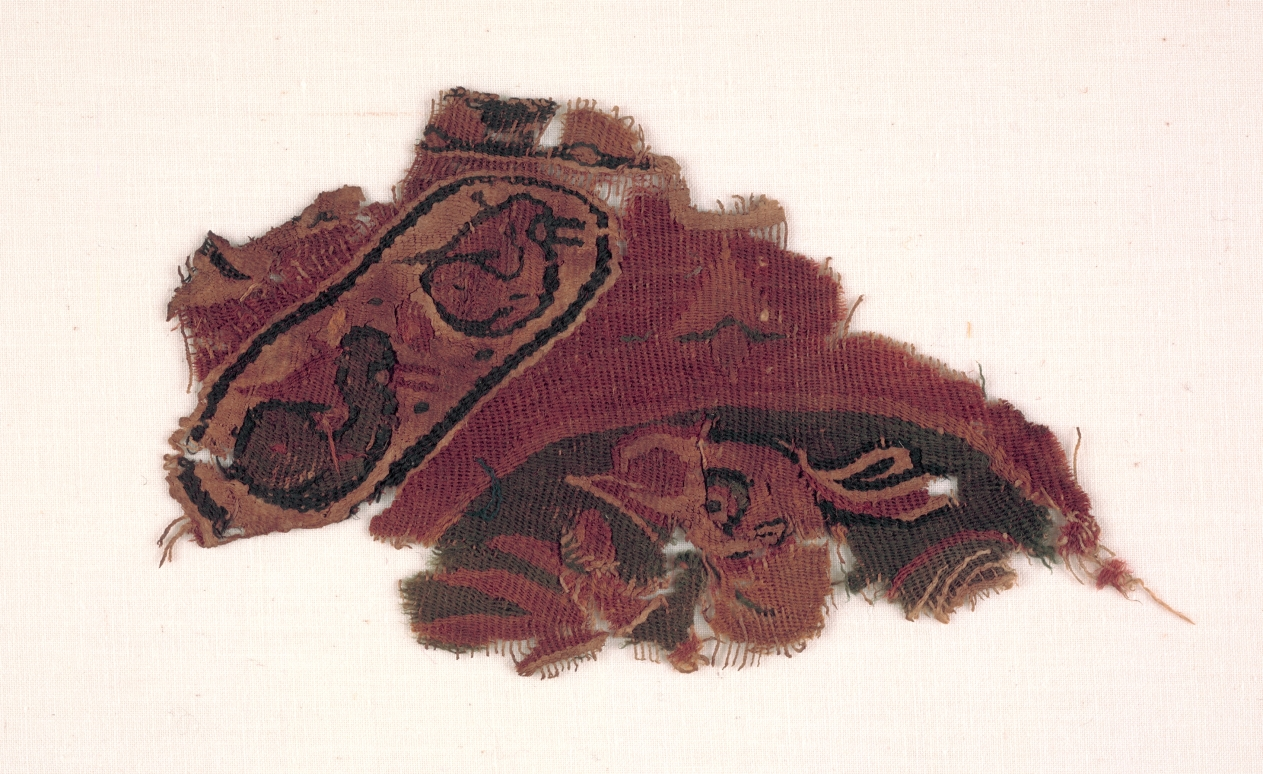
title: Fragment of a Roundel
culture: Egypt, 7th - 9th century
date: 600s - 800s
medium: tapestry; linen and wool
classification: Textile